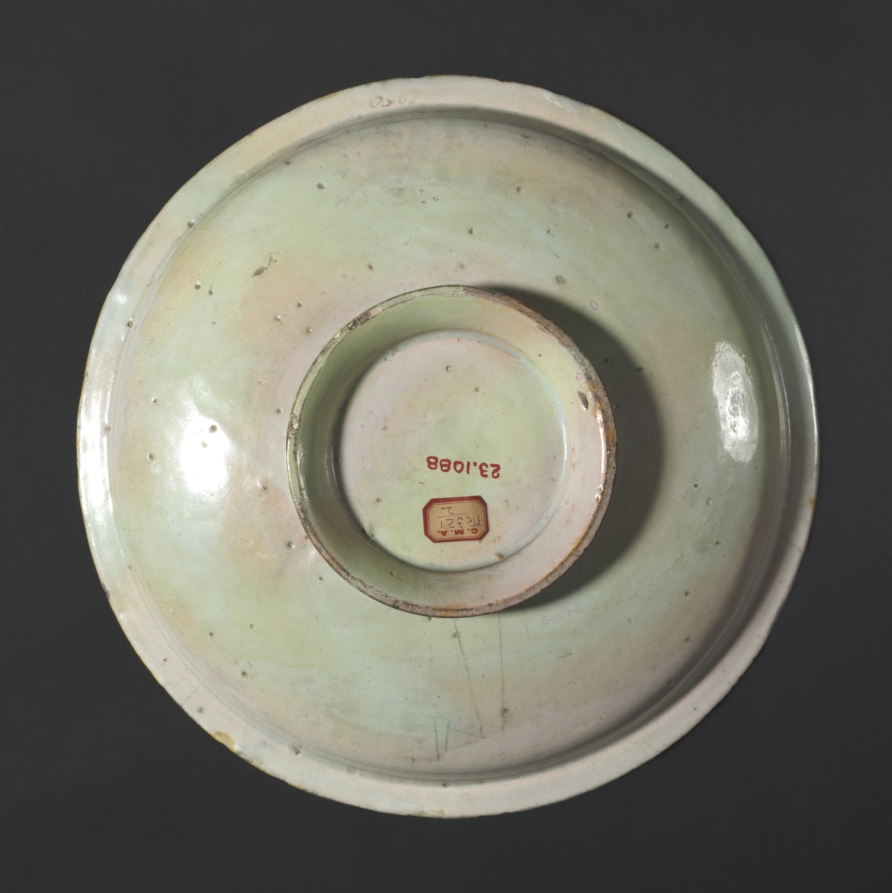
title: Plate with Putto, Masques, and Trophies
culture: Italy, Urbino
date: c. 1530–50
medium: tin-glazed earthenware (maiolica)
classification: Ceramic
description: During the Italian Renaissance of the 1400s and 1500s, nobles and merchants eager to express their wealth and sophistication ordered ceramics for dining, display, and storage. Known as maiolica, because it resembled the brightly colored ceramics from the Mediterranean island of Majorca, these ceramic vessels were covered with a tin glaze that provided an opaque white surface on which colorful decoration and coats of arms as well as mythological or literary stories could be painted.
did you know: In combination, the arms, armor, and winged head of a cherub depicted on this plate symbolize war—a common theme in the midst of the Great Wars of Italy (1494–1559).